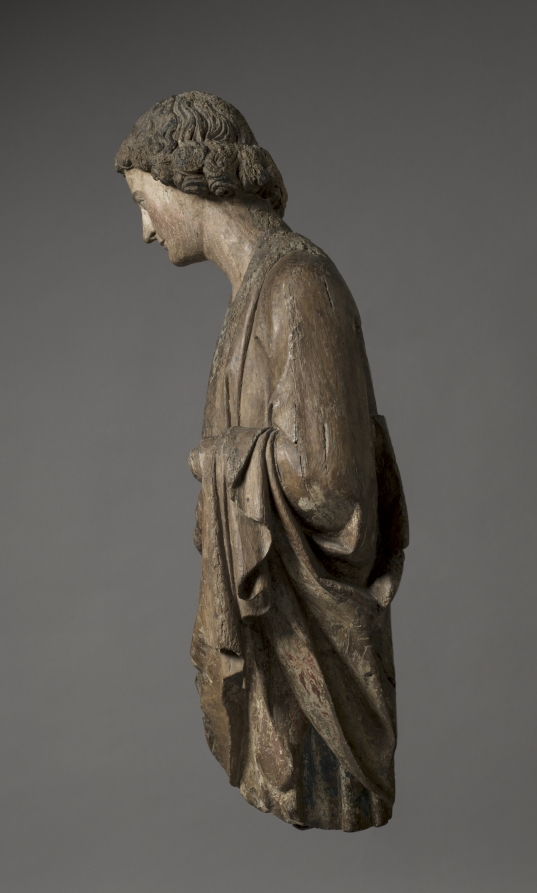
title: Angel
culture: France, vicinity of Reims, 13th century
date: c. 1250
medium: walnut with traces of gilding and polychromy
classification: Sculpture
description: Surviving in fragmentary condition, this pair of angels lacks lower arms, hands, wings, and attributes. Their original paint and gilding, now almost entirely lost, once rendered their garments a rich brocade and their hair a luxuriant gold. Nonetheless, in their graceful poses and sublime faces—which may portray tragic interest, anguish, or deep concern—their original delicacy and power are still evident. They embody the monumental style of 13th-century High Gothic cathedral sculpture in France. Their style specifically suggests they were carved in or around Reims, possibly by sculptors associated with the cathedral there. Their original placement is unknown, but they may have flanked an altar on columns.